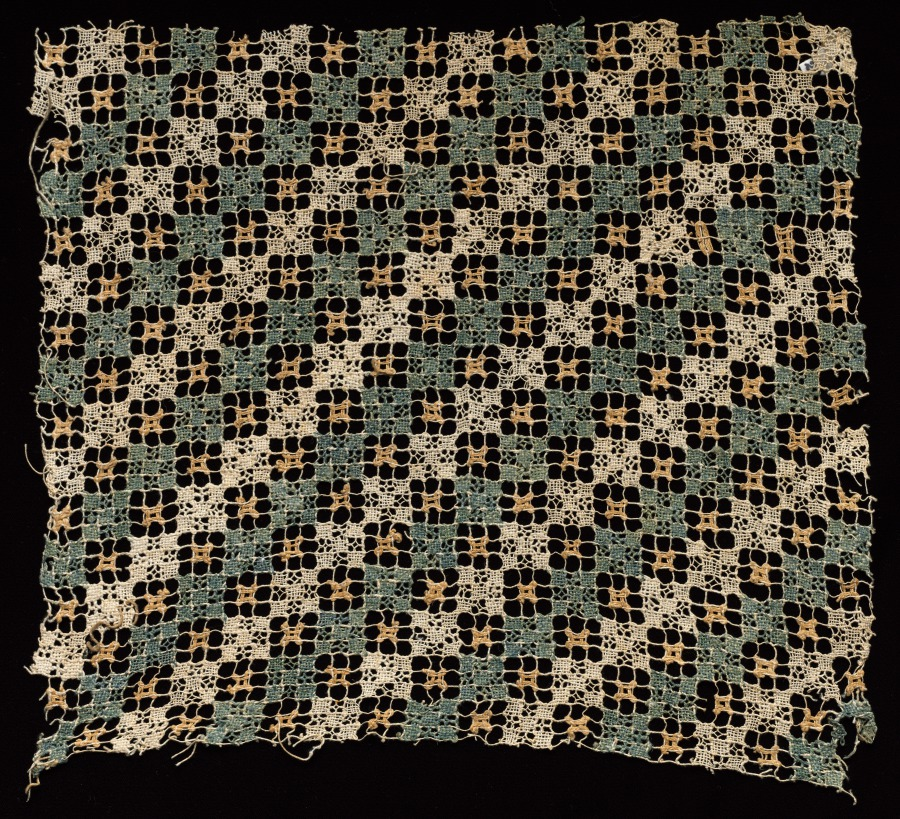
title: Fragment with Repeated Square Pattern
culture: Italy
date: 1500s–1600s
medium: Bleached, dyed, and unbleached linen (est.): needle lace; filet/lacis (knotted ground and darned in two directions)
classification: Lace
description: The prominent colors on this fragment of lace also determine the diagonal and square patterns within the textile. The dark yellow is unbleached linen, the white is bleached linen, and the blue is linen that has been bleached and dyed.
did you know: The word lace derives from the Latin laqueus, meaning noose.